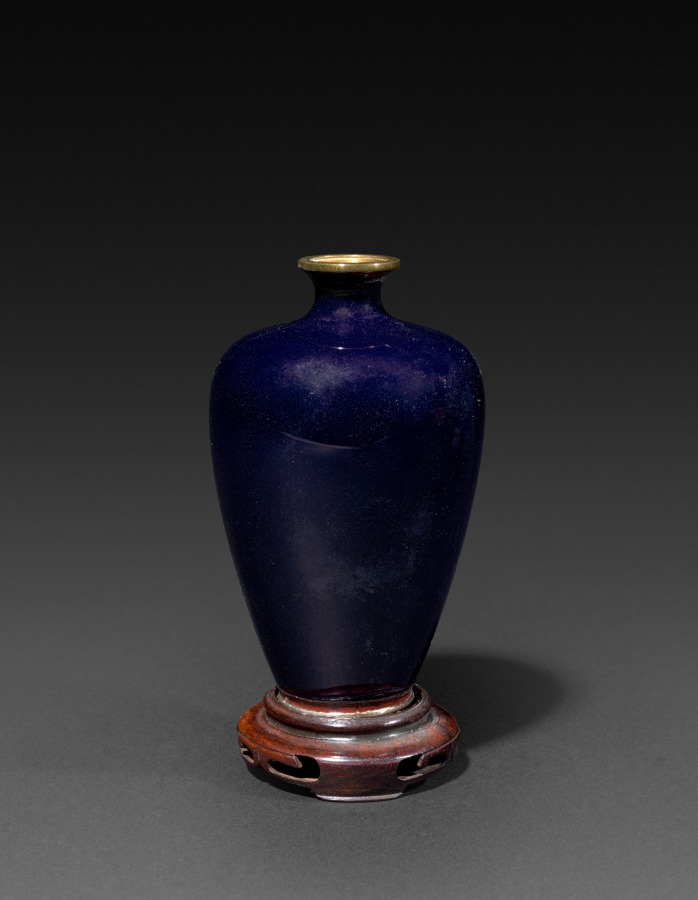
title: Vase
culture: Japan, Meiji period (1868–1912) to Taishō period (1912–26)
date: early 1900s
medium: One of a pair; cloisonne with carved wood base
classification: Enamel